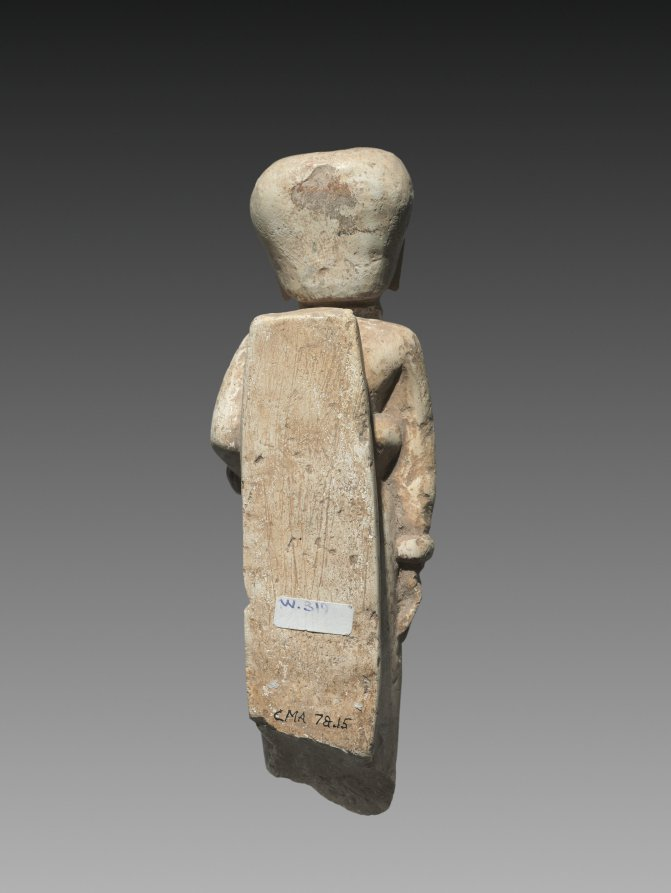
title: Female Figure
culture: Eastern Java, Majapahit Dynasty (1295-1478)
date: 1293–1478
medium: terracotta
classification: Sculpture